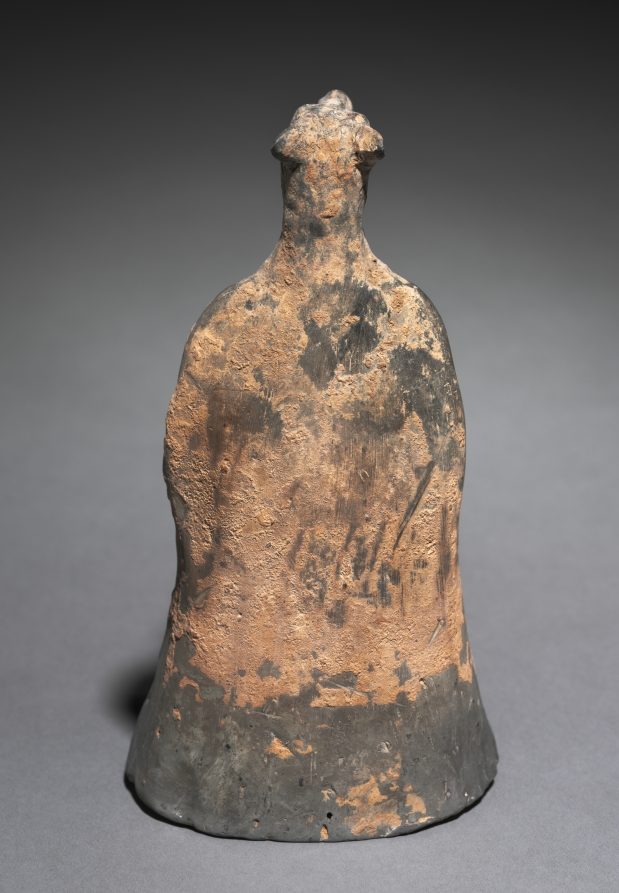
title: Mortuary Figure of the Zodiac Sign: Horse (Libra)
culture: China, Northern Wei dynasty (386-534)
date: 500s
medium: gray earthenware with traces of slip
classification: Sculpture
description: The twelve-animal zodiac series—rat, ox, tiger, rabbit, dragon, snake, horse, goat, monkey, rooster, dog, and boar—signifies a traditional Chinese concept of time structured in a cyclical order. The twelve animals are also linked to the art of fortune-telling that underlies human existence in connection with the changes of the universe. The use of the twelve zodiac animals as tomb furniture suggests they provided a cosmological structure for the afterlife.